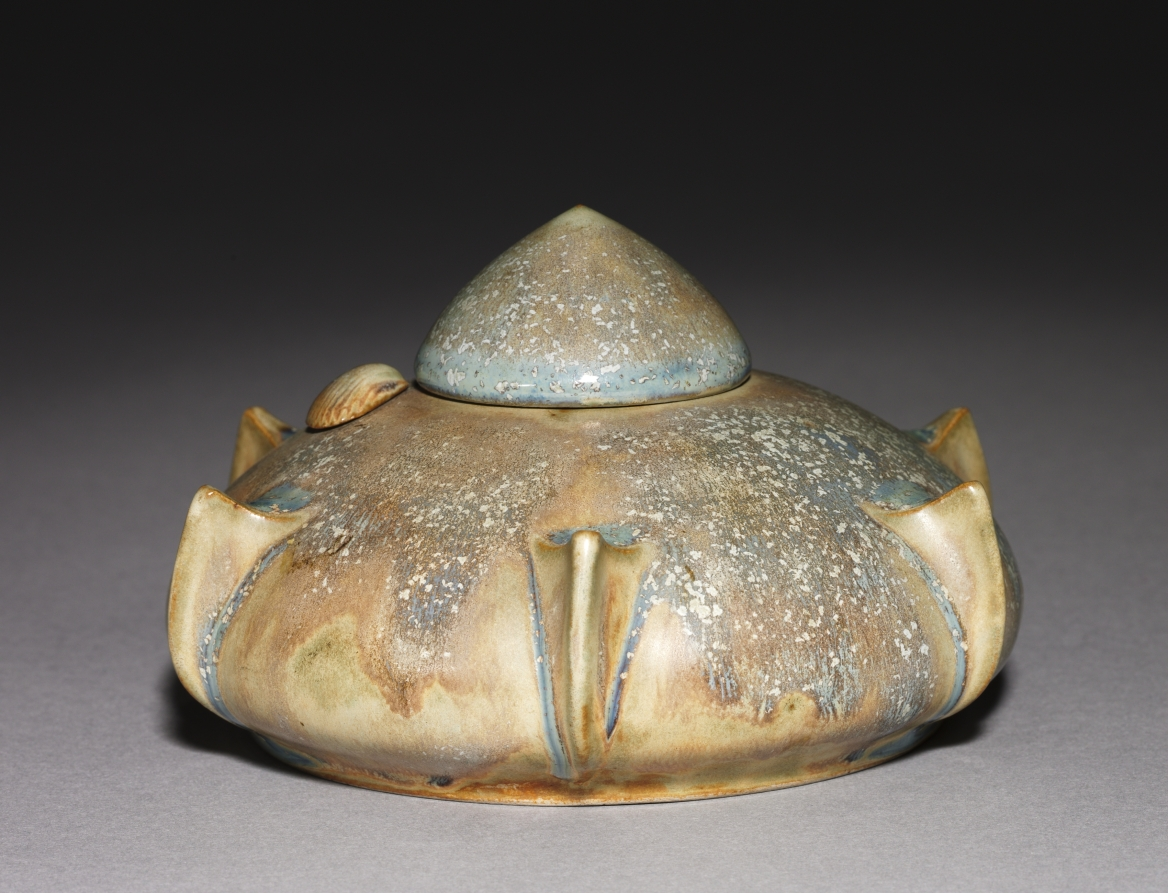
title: Inkwell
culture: France, Sèvres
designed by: Alexandre Sandier (French, 1843–1916)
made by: Sèvres Porcelain Factory (French, est. 1756)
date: 1903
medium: stoneware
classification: Ceramic